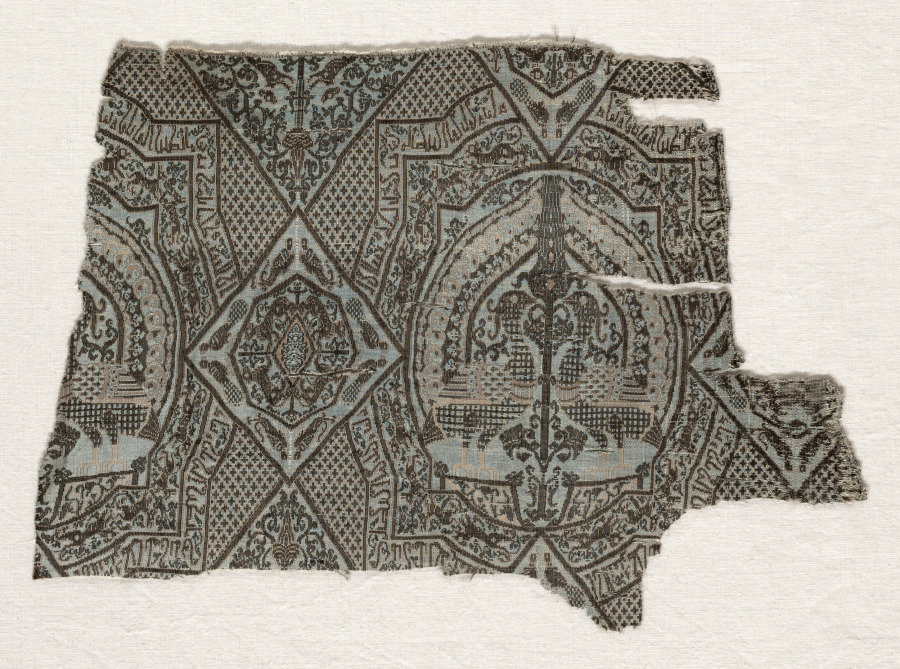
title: Fragment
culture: Iran or Iraq, in the style of the Seljuq period (1037–1194)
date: before 1968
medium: lampas weave, silk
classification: Textile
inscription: fa-idha al-na'imu wa-kullu ma yulha bihi/ yawm (an in superscript) yasiru ilá bilá wa-nafadi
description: Geometric medallions aligned on a diaper ground are enclosed in a grid of large and small lozenges. Medallions contain confronting peacocks flanking a Tree of Life. The double border has an inner frieze of running animals and an outer band of Kufic inscription. The larger diamonds contain four-directional palmette trees and two opposed pairs of rampant animals. The smaller diamonds have pairs of peacocks in each corner framing an octagon, which contains two opposed pairs of animals flanking a central lozenge. Floral vines and ornaments fill the interspaces of large and small diamonds.